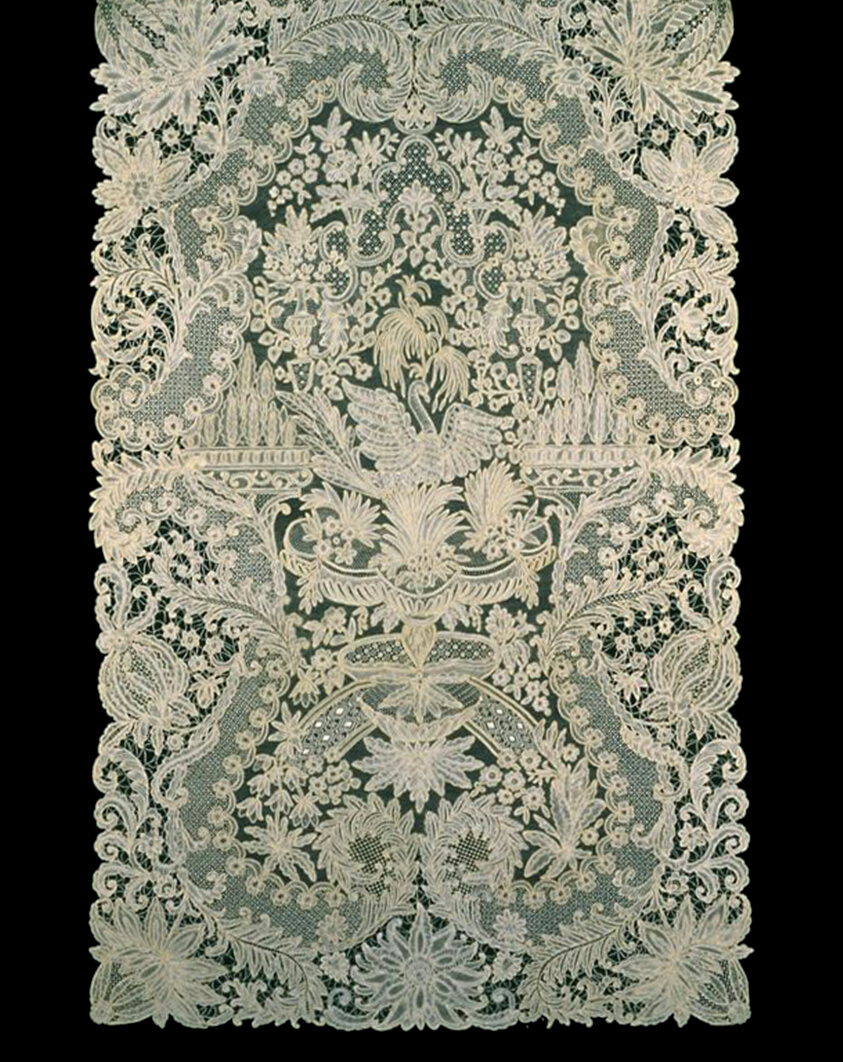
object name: Costume and Accessories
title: Scarf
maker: Belgium, Brussels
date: 1865/1900 (based on design from 1720/30)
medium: Cotton, mixed lace of needle lace and bobbin part lace of a type known as "Duchesse de Bruxelles"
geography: Belgium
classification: textile; lace - mixed; lace; costume